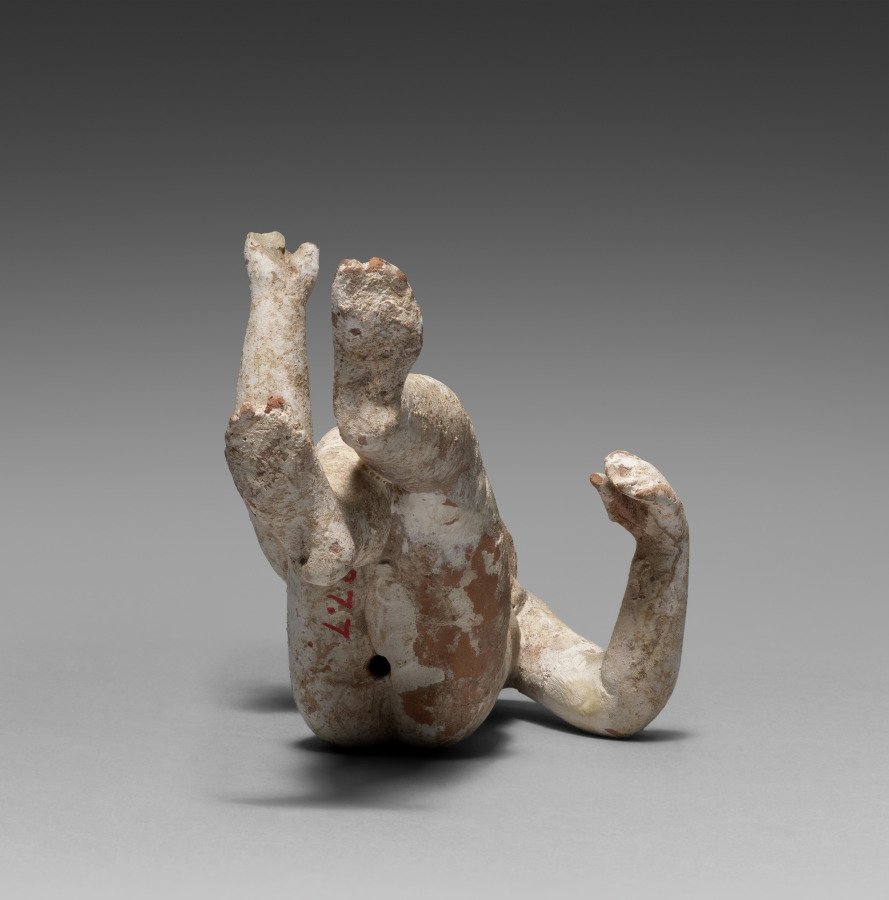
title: Figurine of a Nude Woman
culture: Greece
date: 400–200 BCE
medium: terracotta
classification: Sculpture